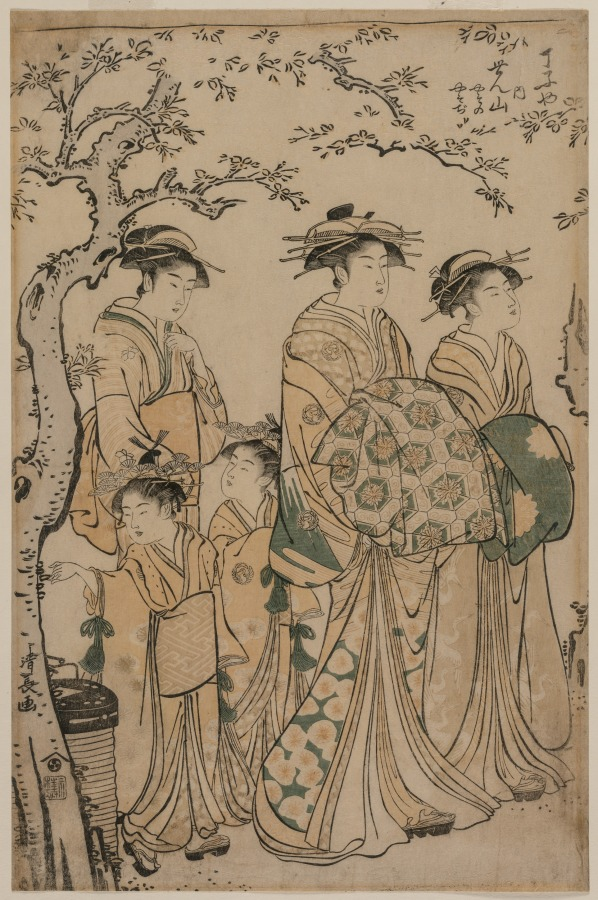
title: The Courtesan Senzan of Chojiya Strolling with her Kamuro Yasono and Yasoji and Two Shinzo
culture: Japan, Edo period (1615–1868)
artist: Torii Kiyonaga (Japanese, 1752–1815)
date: 1786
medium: color woodblock print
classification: Print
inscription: Signature: Kiyonaga ga Publisher: Nishimuraya Yohachi (Eiju han, emblem)